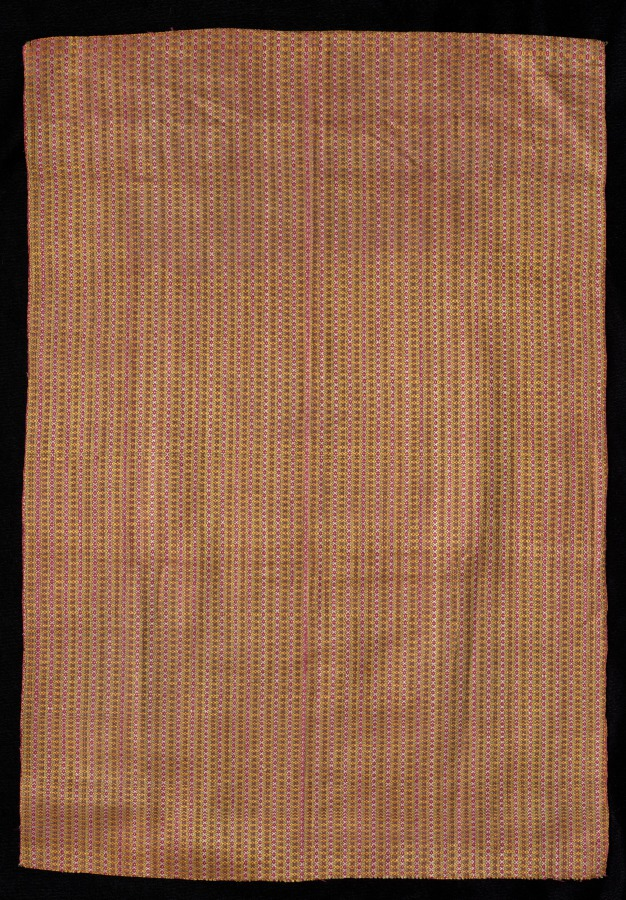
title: Woven Textile Fragment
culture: Western India, Surat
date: 1700s or 1800s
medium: Cotton and silk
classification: Textile